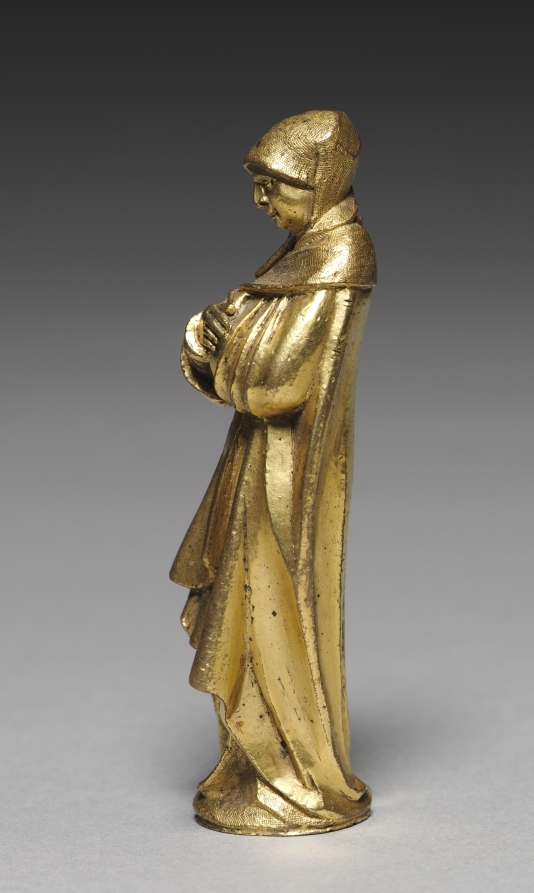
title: Mourning Virgin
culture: Germany, Franconia, late 15th century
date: late 1400s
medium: gilt bronze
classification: Sculpture